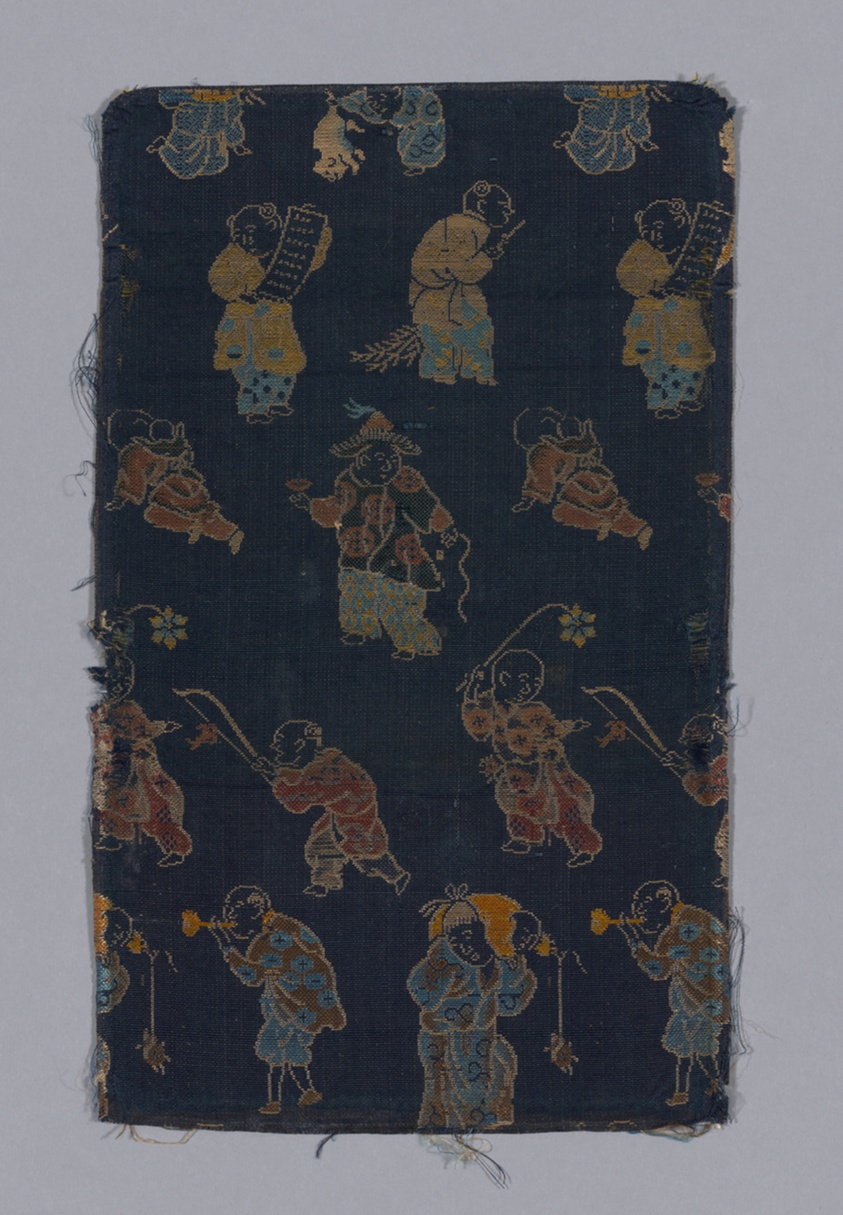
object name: Textile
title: Fragment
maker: Japan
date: 18th century, late Edo period (1789–1868)/ Meiji period (1868–1912)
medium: Plain compound cloth silk.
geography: Japan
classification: textile; weaving